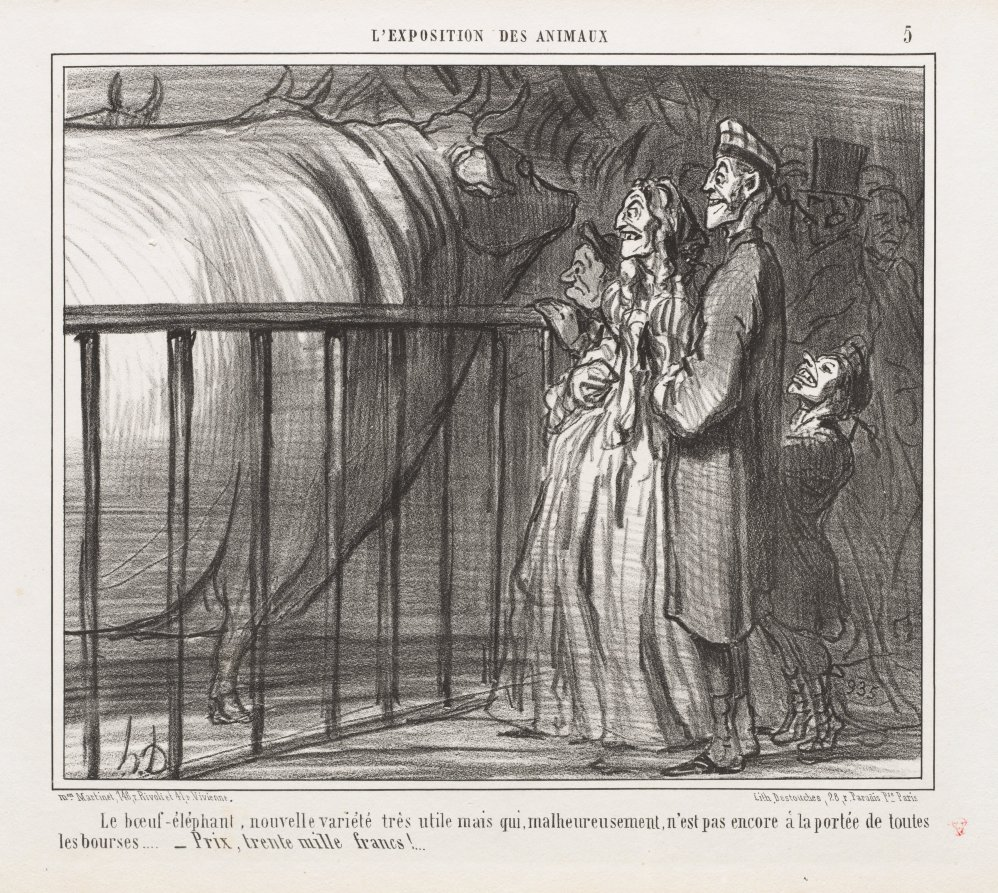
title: The ox-elephant, a new and very promising breed...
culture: France, 19th century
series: Exposition of Animals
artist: Honoré Daumier (French, 1808–1879)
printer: Destouches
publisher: Maison Martinet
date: 1856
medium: lithograph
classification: Print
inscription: Above image, printed: L'EXPOSITION DES ANIMAUX / 5 ; Le bœuf-éléphant, nouvelle variété très utile mais qui, malheureusement, n'est pas encore à la portée de toutes / les bourses.... _Prix, trente mille francs!....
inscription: Lower margin, printed: Mon Martinet, 146, r. Rivoli et 41, r. Vivienne / Lith: Destouches, 28, r. Paradis Pre Paris ; bottom right corner, red collectors mark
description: This print was published in Le Charivari (June 19, 1856) as plate 5 from the series Exposition of Animals.